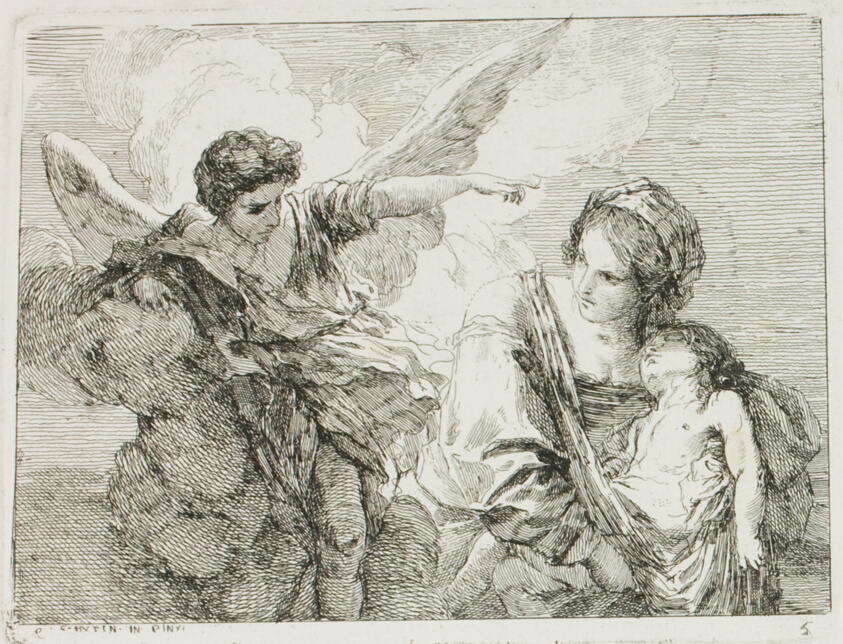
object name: Print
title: Hagar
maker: Charles-François Hutin (French, 1715-1776)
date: 1764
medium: Etching in black on off-white laid paper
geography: France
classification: etching; paper; print; prints and drawing